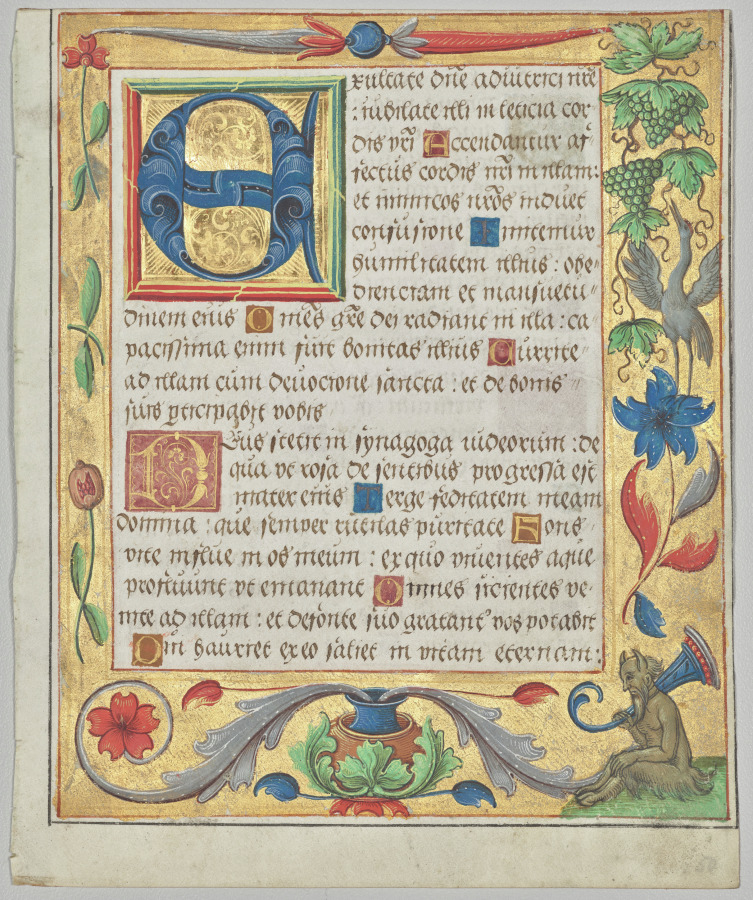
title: Leaf from a Psalter and Prayerbook: Initial E with Ornamental Border Containing a Seated Satyr and a Bird Eating Grapes (recto)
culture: North Germany, Hildesheim (?), 16th century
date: c. 1524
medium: ink, tempera and liquid gold on vellum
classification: Manuscript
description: This leaf and the one nearby were excised from the same prayer book that contained ornamental borders on nearly every page. They represent the intricate decoration found throughout the parent volume, its leaves now dispersed. Virtually every border, recto and verso, or front and back, was decorated with liquid gold and highlighted with a variety of flowers, fruits, vegetables, and animals; here a bird eats grapes while seated below is a satyr, or half goat and half man.